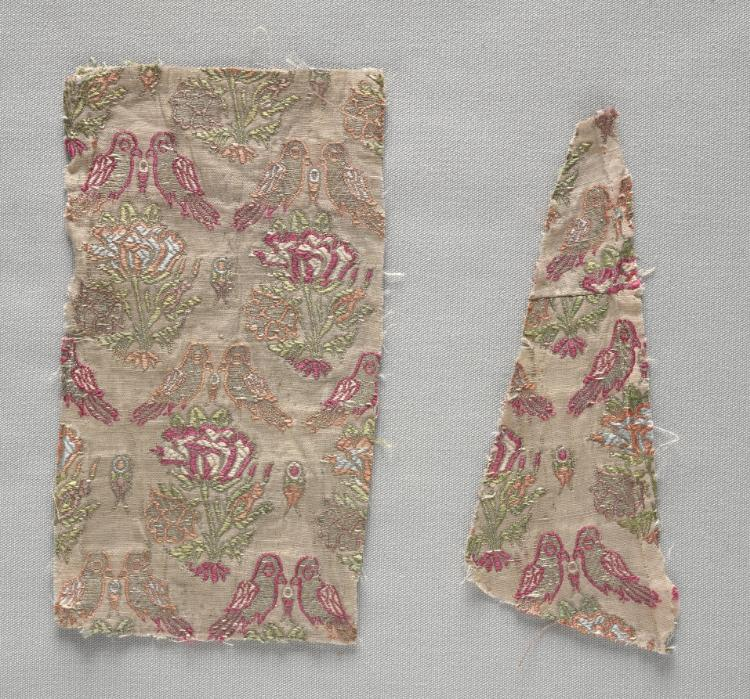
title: Fragments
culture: Iran, 18th century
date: 1700s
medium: lampas weave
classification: Textile